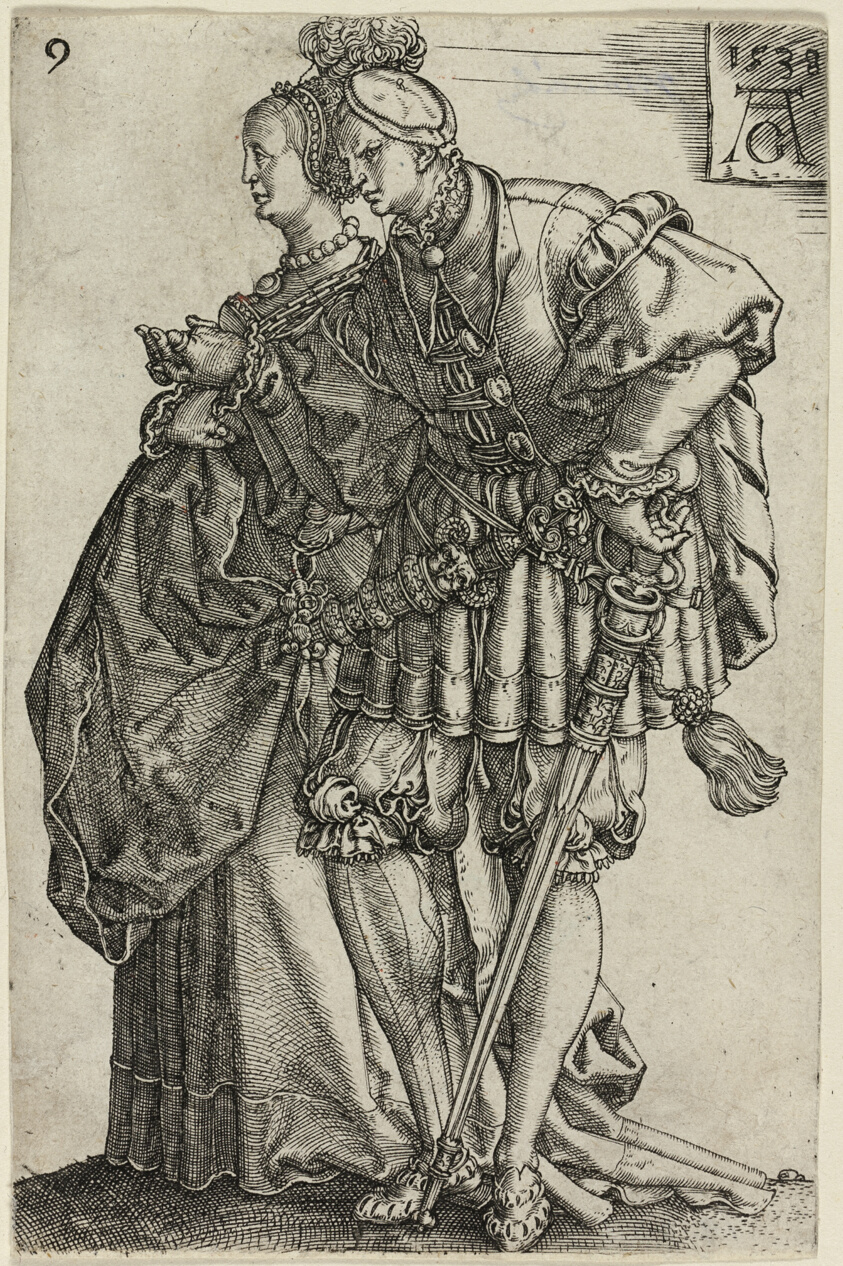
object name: Print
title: Dancing Couple, plate nine from The Large Wedding-Dancers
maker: Heinrich Aldegrever (German, 1502-c.1560)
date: 1538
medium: Engraving in black on ivory laid paper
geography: Germany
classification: engraving; print; prints and drawing